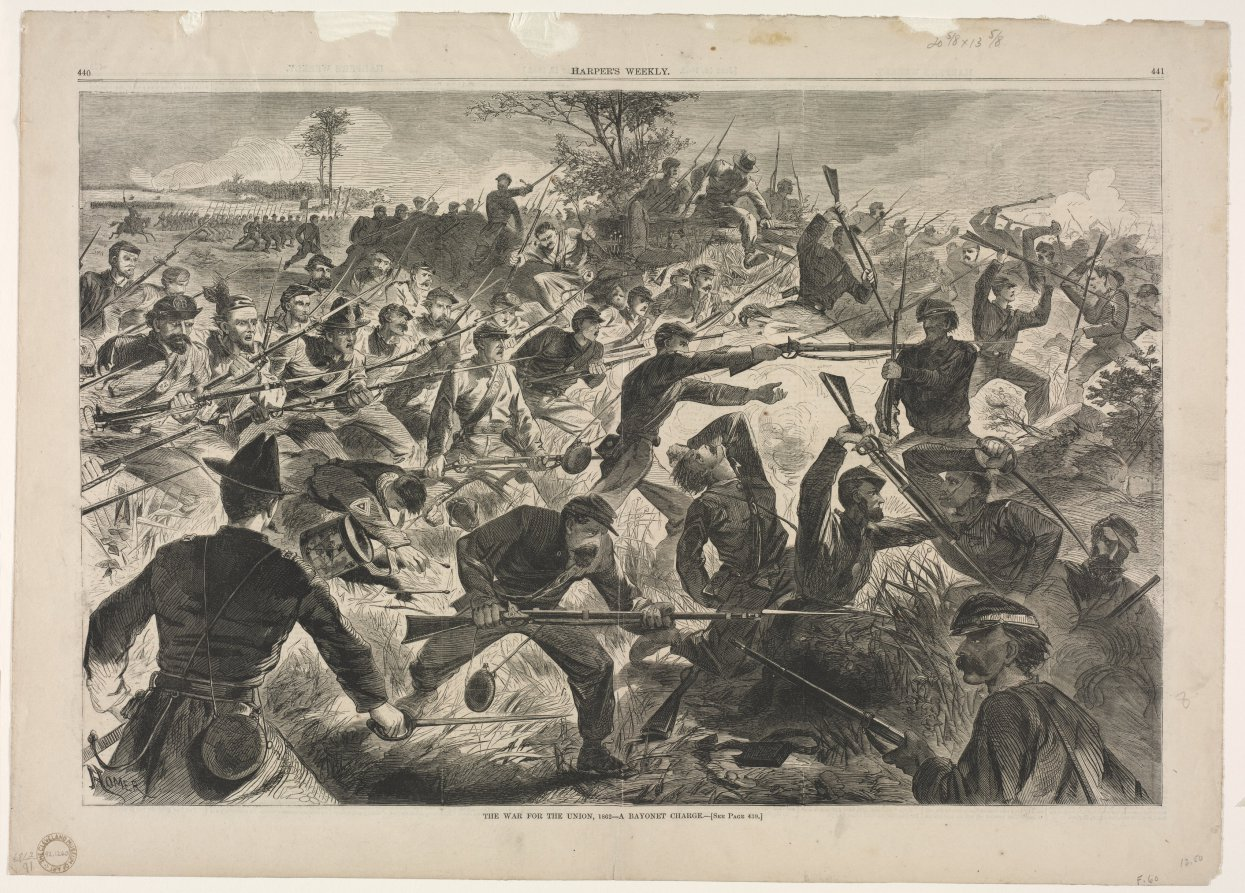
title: The War for the Union, 1862 - A Bayonet Charge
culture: America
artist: Winslow Homer (American, 1836–1910)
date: 1862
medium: wood engraving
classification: Print